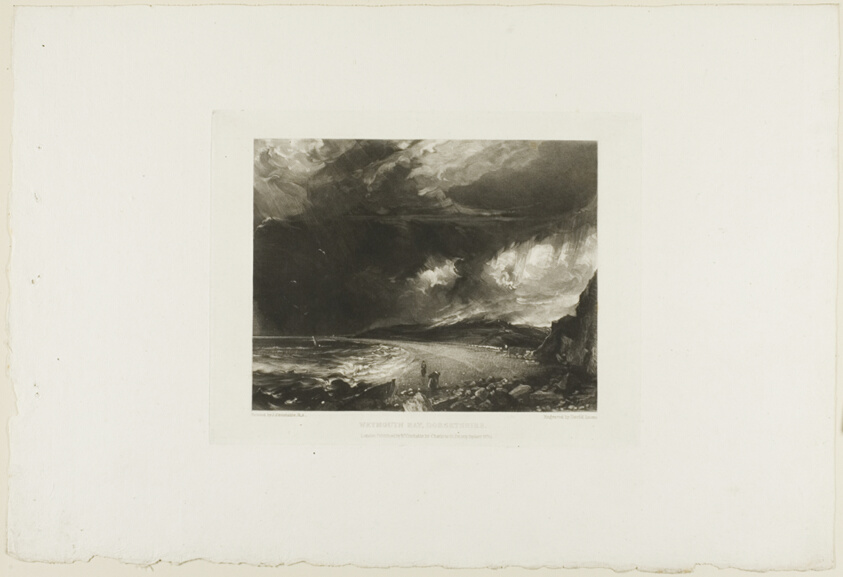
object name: Print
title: Weymouth Bay, Dorsetshire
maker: David Lucas (English, 1802-1881); after John Constable (English, 1776-1837)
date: 1830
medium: Mezzotint on paper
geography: England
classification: mezzotint; print; prints and drawing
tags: landscapes